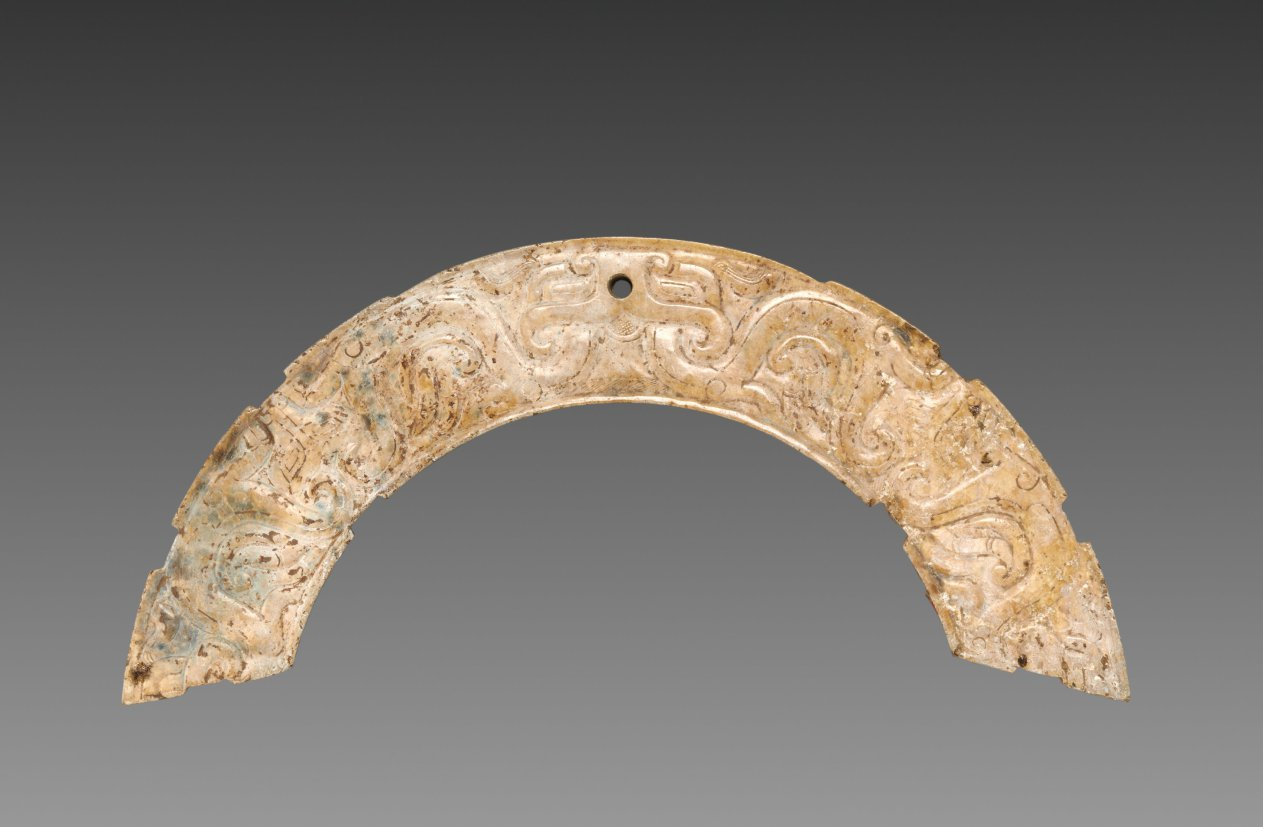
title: Arc-shaped Pendant with Animal Mask and Interlaced Animal Bands (Huang)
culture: China, Warring States period (475–221 BCE) to Western Han dynasty (206 BCE–8 CE)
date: 300–100 BCE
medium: jade (nephrite)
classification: Jade